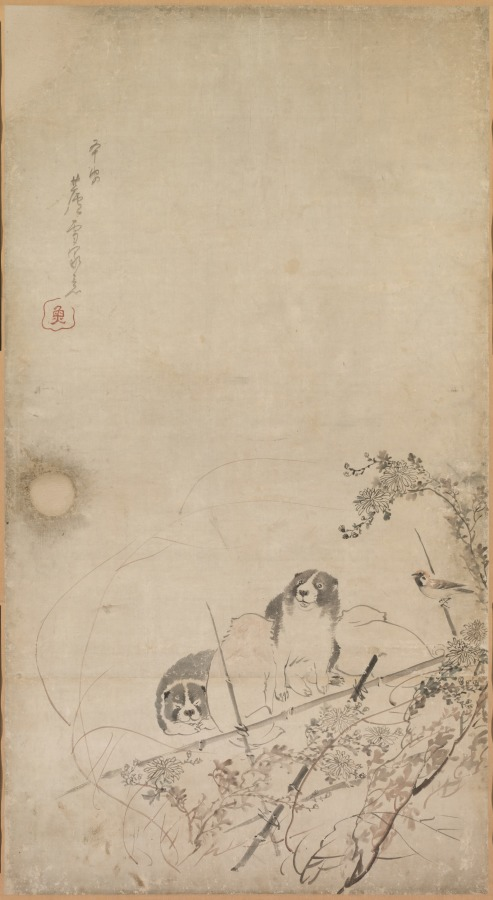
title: Puppies, Sparrows, and Chrysanthemums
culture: Japan, Edo period (1615–1868)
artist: Nagasawa Rosetsu (Japanese, 1754–1799)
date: c. 1792–94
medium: Fusuma panel remounted as a hanging scroll; ink and slight color on paper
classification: Painting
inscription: Signature and seal of artist upper left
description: These paintings were originally mounted as sliding doors (fusuma) used inside a building. The circular areas on the paintings’ paper surfaces are traces of the former positions of the door pulls (hikite). A flock of sparrows gathers on a trellis supporting flowering chrysanthemum. Below is a litter of puppies, some cavorting, others napping. The tender story created by the curious puppy peering up and tilting its head to listen to the bird’s insistent call in the leftmost part of the composition is characteristic of Nagasawa Rosetsu’s paintings, which often use animals to illustrate the human condition.